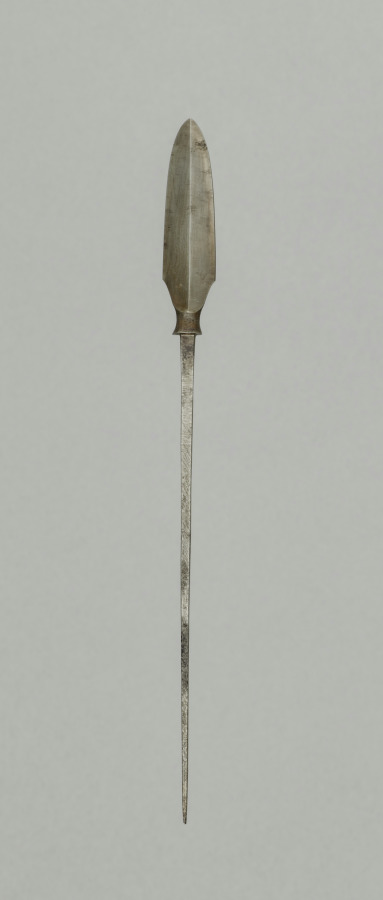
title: Arrow Point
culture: Japan, Edo period (1615–1868)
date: 1700s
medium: steel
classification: Arms and Armor